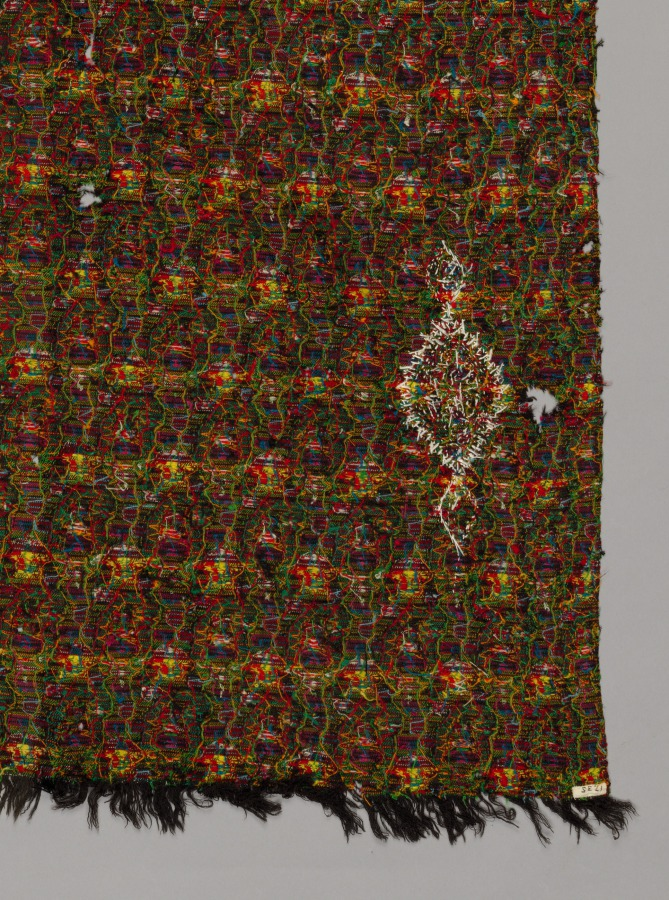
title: Shawl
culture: India, Punjab, late 19th century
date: late 1800s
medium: tapestry twill; wool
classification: Textile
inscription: Arabic inscription in left corner; may give name and/or date.